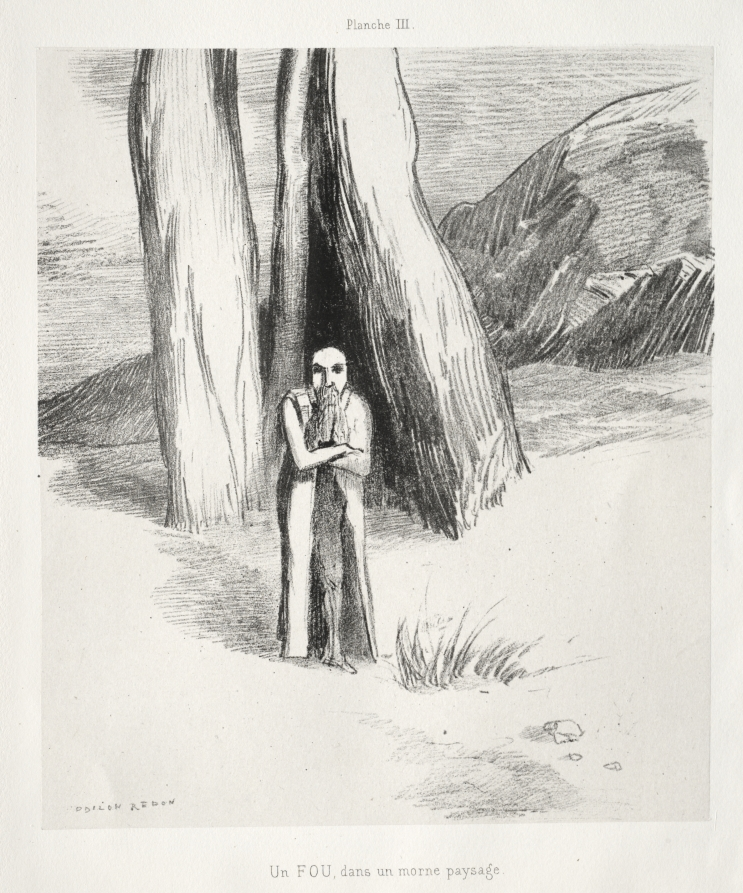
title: A Madman in a Dismal Landscape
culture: France, 19th century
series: Homage to Goya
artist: Odilon Redon (French, 1840–1916)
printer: Lemercier & Cie.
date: 1885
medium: lithograph on China paper laid on wove paper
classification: Print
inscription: printed above image at center: Planche III.; below image at center: Un FOU, dans un morne paysage.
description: This series is one of many that Odilon Redon created throughout his career. Nearly two-thirds of his lithographs took the form of portfolios—prints connected conceptually by a theme or narrative and physically by a folder or binding. Such works were often dispersed over time, but Cleveland was fortunate to acquire several complete sets with their original covers during the 1920s. Dating from Redon’s early experimentation with lithography, Homage to Goya was intended as a tribute to 18th-century Spanish master Francisco de Goya, whose interest in dreams and the subconscious influenced Redon. The six seemingly unrelated images celebrate Goya’s ambiguity and collectively suggest the introspection and isolation of artistic practice.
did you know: This portfolio was published in an edition of 50, one of which Redon sent to poet Stéphane Mallarmé soon after Redon became a frequent participant in a literary salon held regularly at Mallarmé's home.